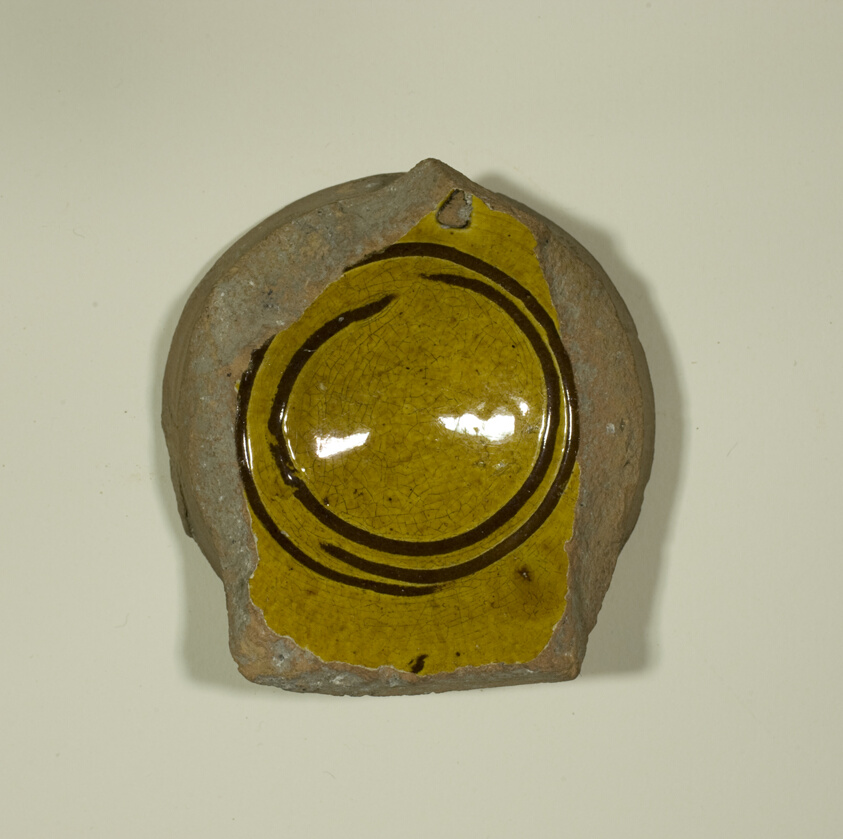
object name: Decorative Arts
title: Fragment of a Bowl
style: byzantine, european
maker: Byzantine (Greece, Thessaloniki)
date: 13th-14th century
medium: Ceramic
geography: Istanbul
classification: fragment; ceramics; vessel; bowl; asian art; decorative arts